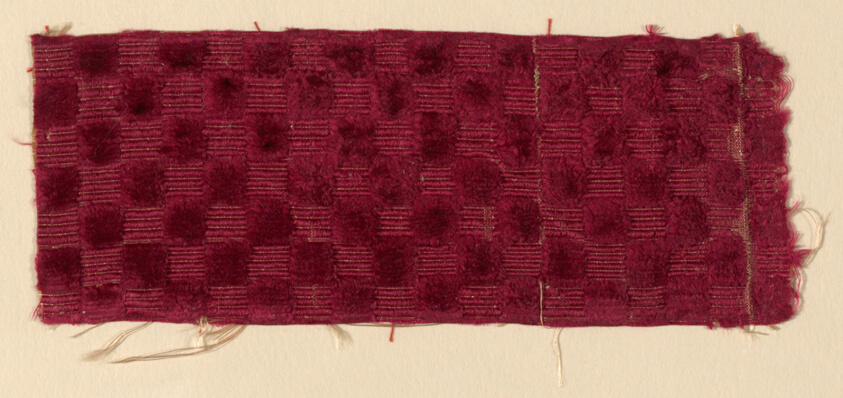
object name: Textile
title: Fragment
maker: Italy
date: 1575/1625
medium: Silk, cut, uncut, and voided velvet with additional warp floats against plain weave foundation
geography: Italy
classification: textile; weaving - velvet